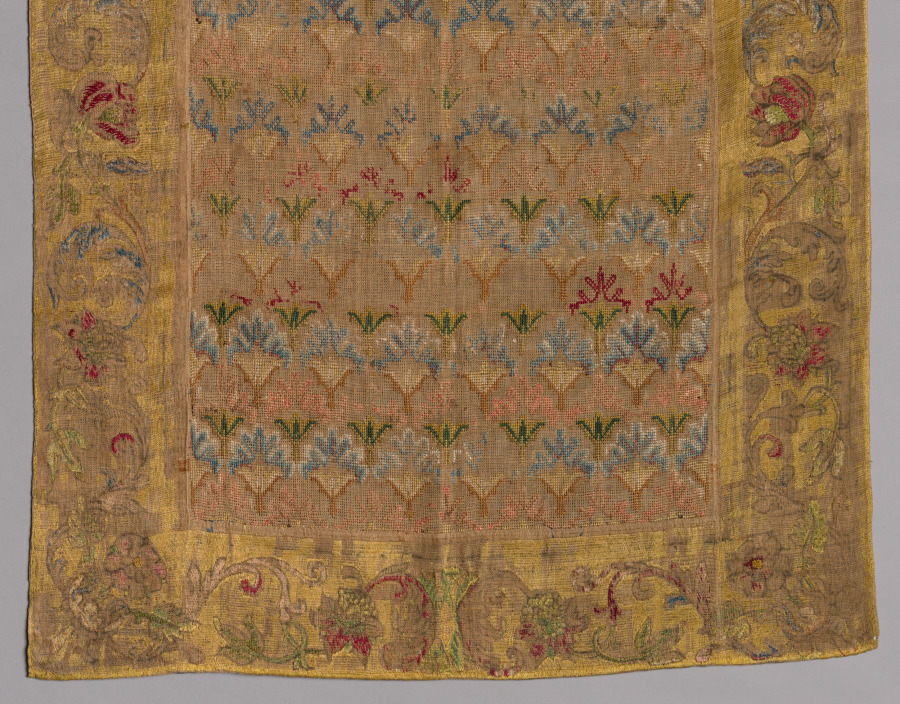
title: Embroidered Panel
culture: Italy, 17th century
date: 1600s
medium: embroidery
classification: Embroidery